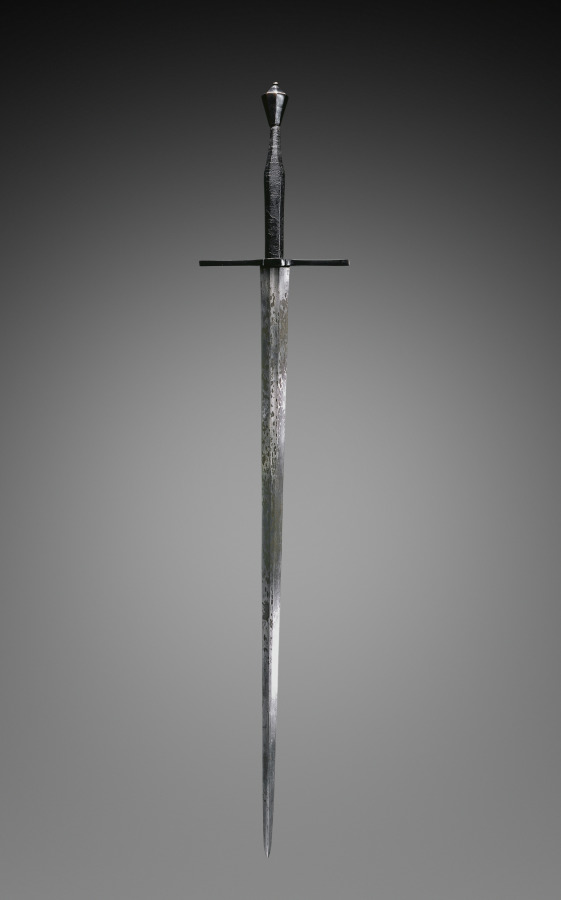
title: Hand-and-a-Half Sword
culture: Germany, mid-16th century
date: c. 1550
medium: steel, blued pommel and quillions, leather grip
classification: Arms and Armor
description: A hand-and-a-half sword is a large sword with a double-edged blade and a long grip so it could accommodate both hands. It was also know as a bastard sword. It would primarily be used with one hand, but if desired, the second hand could be used to give extra weight to the blow.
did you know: There are three unidentified marks on the fuller of this blade.